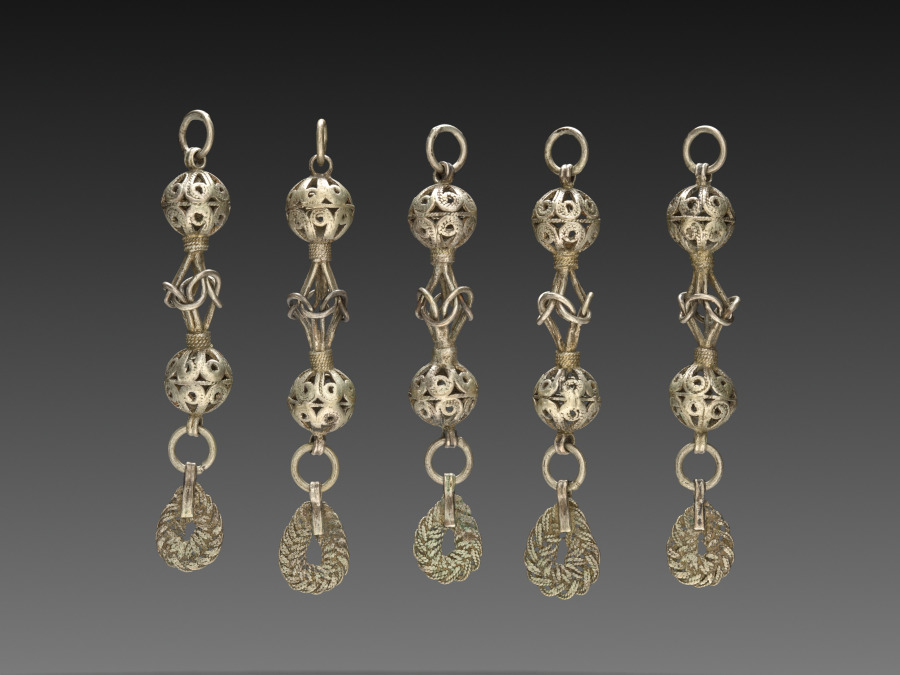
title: Set of Buttons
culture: Balkans, 19th century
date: 1800s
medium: silver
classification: Jewelry